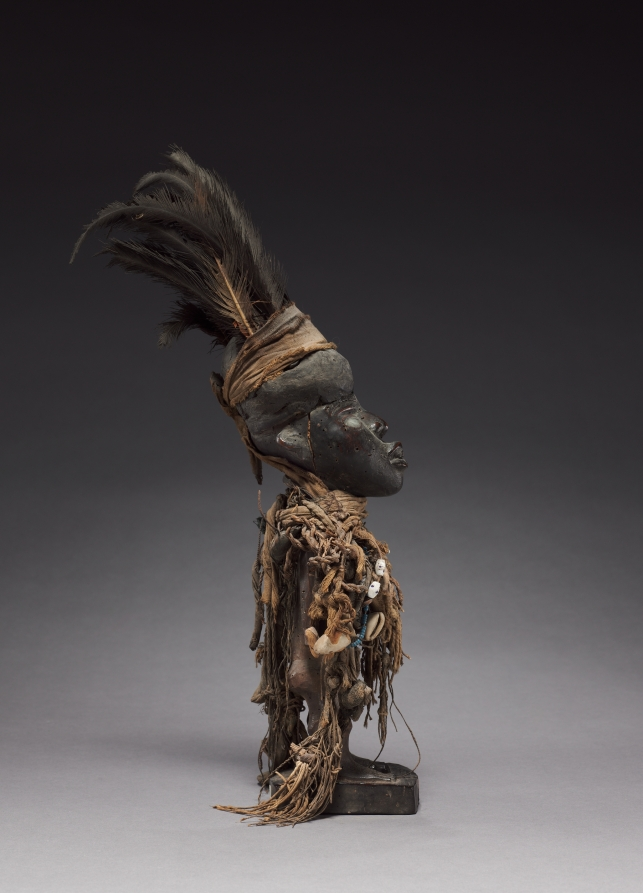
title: Male Figure (Nkisi)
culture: Africa, Central Africa, Democratic Republic of Congo, Cabinda, or Republic of the Congo, probably Vili-style maker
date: late 1800s-early 1900s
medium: Wood, cloth, resin, organic material, feathers, natural fibers, antelope horn, seashells (including cowrie shells), glass beads, metalized glass, and plant fiber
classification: Sculpture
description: Nkisi is an object that is believed to host an ancestral spirit. Unusual among these figures, this nkisi figure is missing its nduda, “night guns.” These guns would be filled with gunpowder functioning as defense against witches or misfortune. Unless its guns were lost during the course of its life history, this nkisi may instead be an example of a more general type called mpanzu, whose functions included protection.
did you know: Different from other figures functioning as defense against witches or misfortune, its “night guns,” or nduda, are missing.